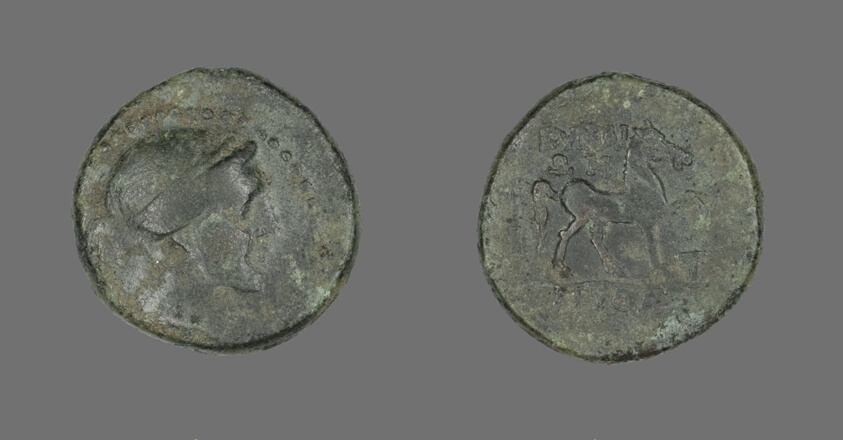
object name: Coin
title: Coin Depicting the Amazon Cyme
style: greek, ancient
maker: Greek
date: 250-190 BCE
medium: Bronze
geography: Ancient Greece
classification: coin; ancient art